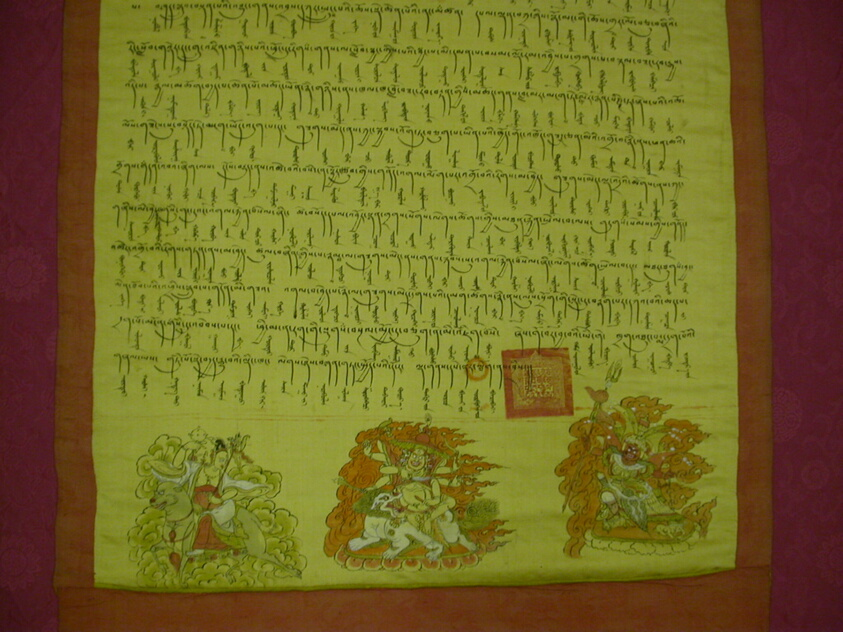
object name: Painting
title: Monastic Decree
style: Himalayan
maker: Tibet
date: 19th century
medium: Ink, colors, and gold on silk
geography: Tibet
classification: painting; asian art